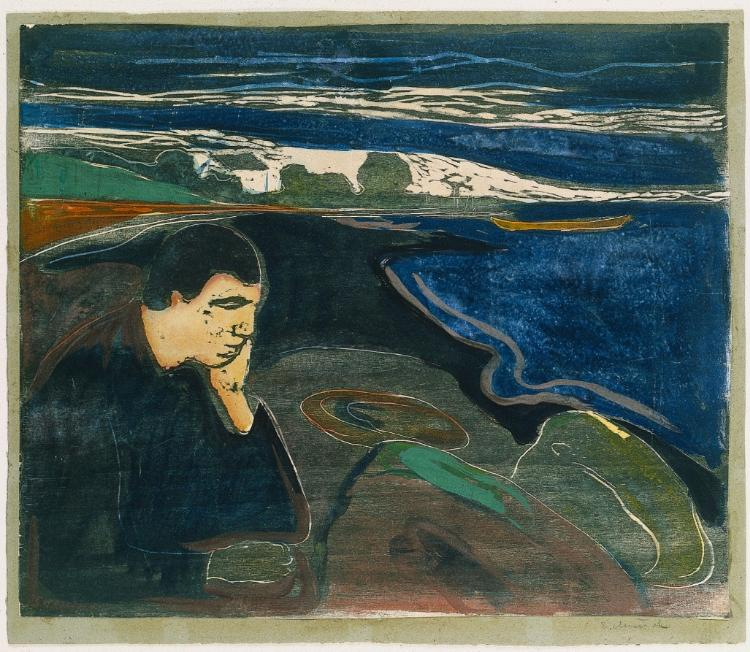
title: Evening, Melancholy I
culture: Norway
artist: Edvard Munch (Norwegian, 1863–1944)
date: 1896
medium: Hand-colored woodcut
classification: Print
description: Evening, Melancholy I depicts the jilted, tormented art critic Jappe Nilssen, Munch's friend, on the shore of Åsgårdstrand, a fishing village south of Oslo. Munch chose heavily grained blocks of wood, allowing the pattern of the board to add texture to the scene, and he exploited the handmade aspect of the technique by carving blocks crudely. He also experimented so that each impression is unique, using black ink on the woodblock and watercolor and gouache to color the sheet extensively. An example of how method can reinforce meaning, the simplified shapes, flattened space, and dark hues create a visual correspondence to the figure's deep depression.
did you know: This print is one of only two known impressions printed from the first state of the block before it was cut into two sections.